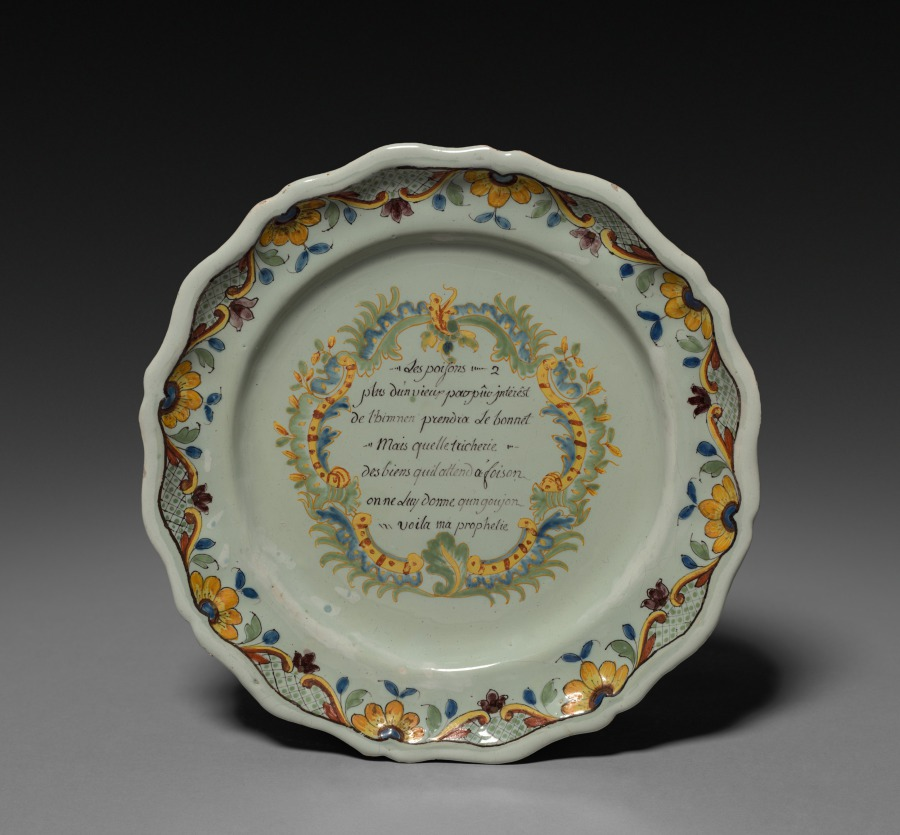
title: Plate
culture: France, Montauban(?), 18th century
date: c. 1780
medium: faience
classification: Ceramic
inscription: inscribed with French poen in the center.